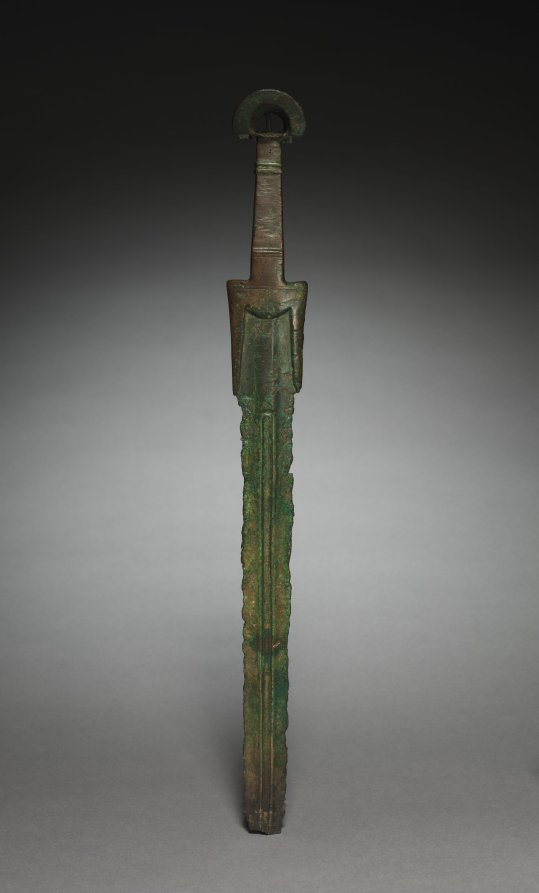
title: Sword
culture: Iran, Luristan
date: 2000–1000 BCE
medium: bronze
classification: Arms and Armor